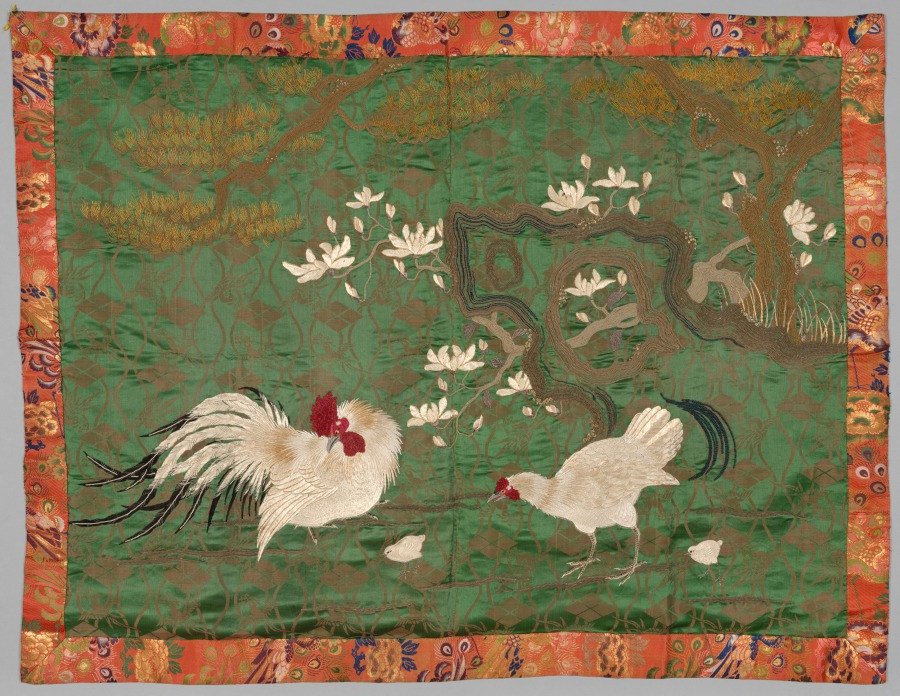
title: Embroidered Fukusa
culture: Japan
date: late 1800s-early 1900s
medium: embroidered silk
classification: Embroidery